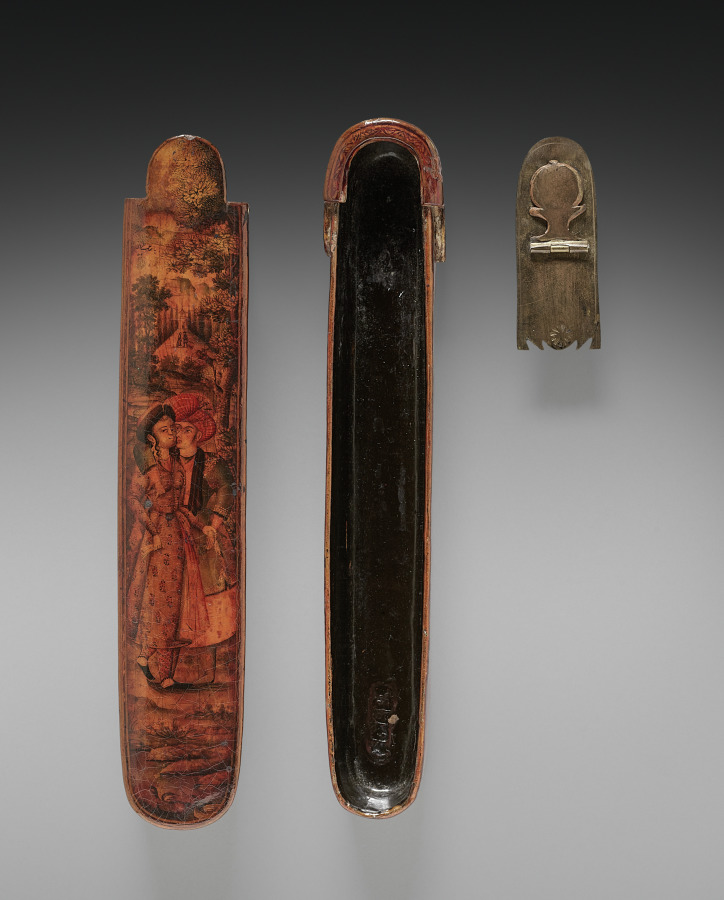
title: Pen and Ink Box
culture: Iran, probably Isfahan, Safavid period (1501–1722)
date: 1667–98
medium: Varnished lacquer and opaque watercolor over papier-mâché, ink, and copper alloy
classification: Lacquer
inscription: 1109